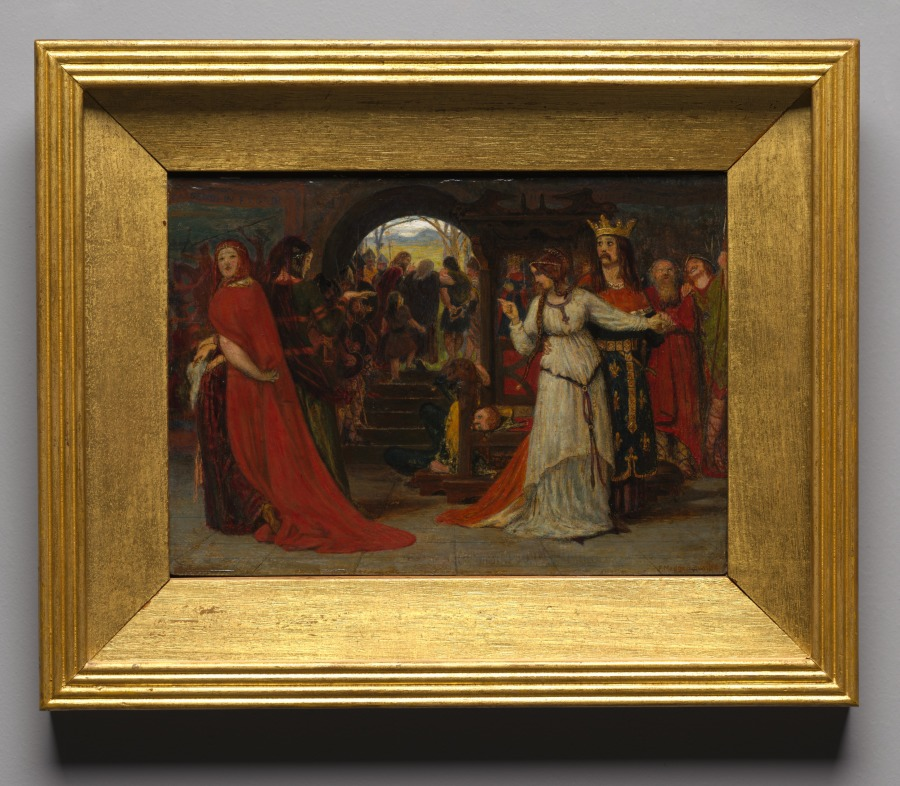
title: Cordelia Parting from her Sisters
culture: England, 19th century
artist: Ford Madox Brown (British, 1821–1893)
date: 1854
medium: pen and oil on paper on panel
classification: Painting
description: Reimagining English history was one way that Victorian (1837–1901) artists rooted themselves during a period of tremendous social and political change and life-altering technological advances. Ford Madox Brown’s expressive and vividly colored sketch for an unrealized project takes a story from Britain’s most famous playwright, Shakespeare. The artist chooses the dramatic moment when King Lear’s daughter Cordelia parts ways with her sisters.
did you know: In 1861, Ford Madox Brown became a founding member of William Morris’s decorative arts company. Besides painting, he also designed stained glass and furniture.